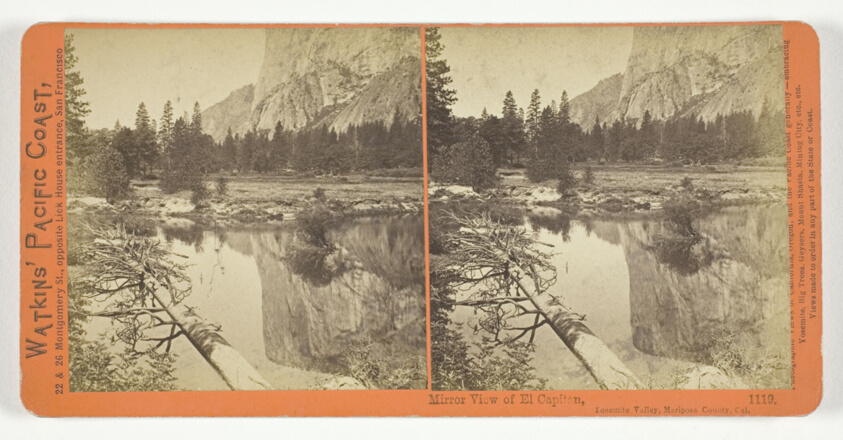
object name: Photograph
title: Mirror View of El Capitan, Yosemite Valley, Mariposa County, Cal., No. 1119 from the series "Watkins' Pacific Coast"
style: 19th century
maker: Carleton E. Watkins; American, 1829-1916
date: 1861/76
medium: Albumen print, stereo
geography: United States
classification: stereograph (albumen); albumen silver print; photographic process; photography; photograph